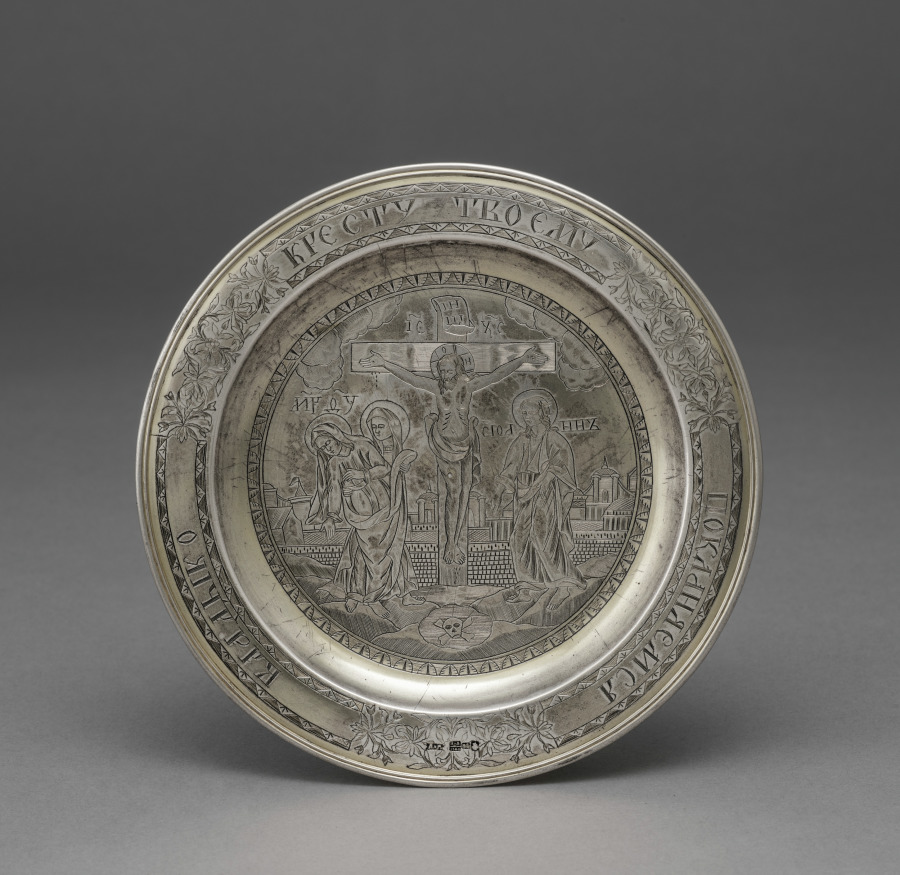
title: Paten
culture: Russia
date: 1800s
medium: engraved silver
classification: Silver